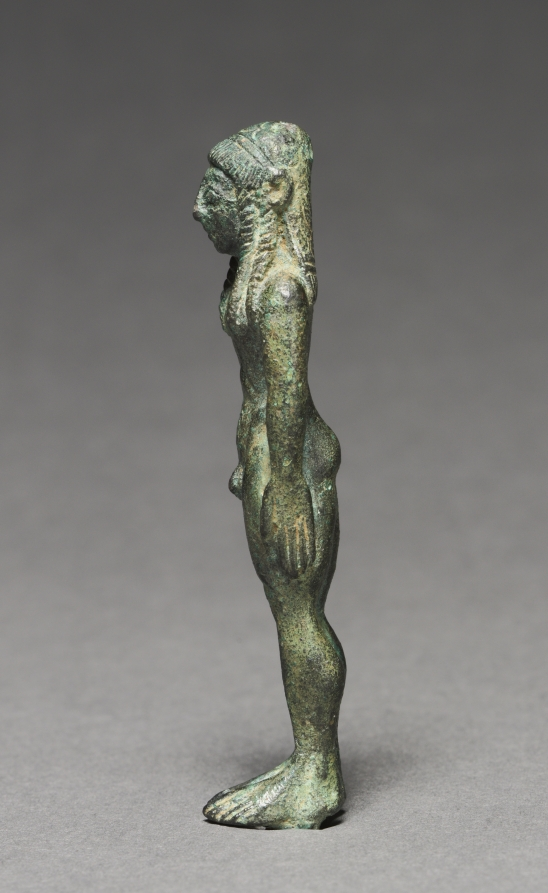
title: Statuette of a Kouros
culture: Etruscan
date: 600–480 BCE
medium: bronze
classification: Sculpture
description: Though almost certainly Etruscan in origin, this small-scale bronze takes the form of a Greek kouros, a nude male youth with arms at sides looking straight ahead. The left foot appears ever so slightly advanced, but not enough to create any real sense of movement. Two long locks of hair fall over each shoulder, recalling Ionian (East Greek) examples, but the scale-like pattern on the back of the head is unusual. Despite the lack of nudity in most other Archaic Etruscan artworks, the kouros became quite popular as a small bronze votive type in Etruria.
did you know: Unlike Greek kouroi, which range in medium and scale, Etruscan kouroi are primarily small bronzes.